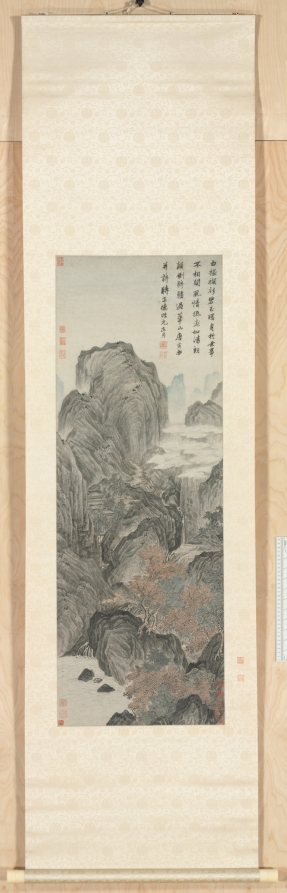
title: Mount Hua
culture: China, Ming dynasty (1368–1644)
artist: Tang Yin (Chinese, 1470–1523)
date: 1506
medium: hanging scroll; ink and light color on paper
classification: Painting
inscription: Artist's inscription, signature, and 4 seals: Wearing a white-bordered scholar's robe and green jade pendants, His life is unconcerned with worldly fame. Like P'an Lang resisting old age through high spirits, Crazy and clumsy he rides his donkey past Mount Hua. T'ang Yin painted this and composed the poem, the first month of the year of the Cheng-te era [1506]. [2 seals] T'ang Tzu-wei yin; T'ang. [2 seals, lower left corner] Po-hu T'ang Yin ssu yin; T'ang Chü-shih. trans. LYSL 12 additional seals: 2 of Wang Shan (1645-1728); 5 of Liu Shu (1759-1816); 1 of Yeh Ao (19th c.); 1 label and 2 seals of Lu Hui (1851-1920); 2 seals unidentified.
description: In this work, Tang Yin accumulates towering mountain summits in the manner of the Sung master, Li Tang, to capture the monumental presence of his subject. Tang Yin’s angular brushstrokes and ink washes of varied intensity give texture to the rocky surface and accent the play of light. Mount Hua is situated in southern Shaanxi province in North China. Hardly accessible during Tang Yin’s time, the mountains were frequented by immortality seekers to dwell or collect herbal drugs there. Tang Yin's potentially brilliant career was shattered in 1499 after he went to the capital to take the jinshi examination. He got entangled in a bribery case that caused him to spend seven years in prison. After his release, Tang returned to Suzhou, and settled on a career as a professional painter. One of Tang's few dated works, Mount Hua was painted seven years after this incident.